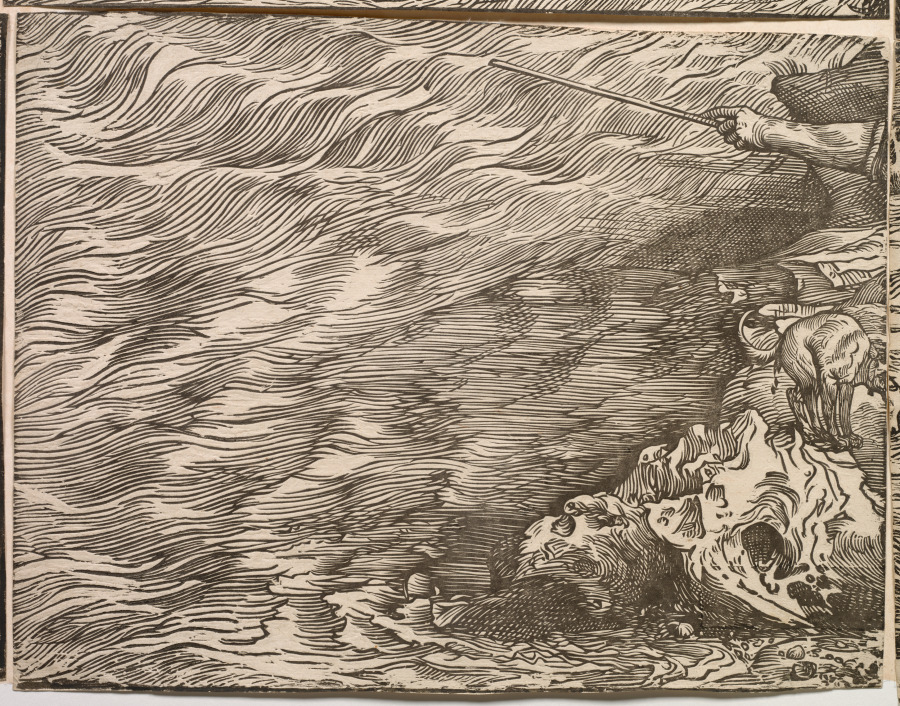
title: The Submersion of Pharaoh's Army in the Red Sea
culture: Italy, Venice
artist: Titian (Italian, c. 1488–1576)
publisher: Domenico dalle Greche (Italian, 1503–1603)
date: 1514–15, printed 1549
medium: woodcut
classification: Print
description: To make this monumental woodcut—considered one of the most ambitious prints of the Renaissance—Titian probably drew directly on the wooden blocks, after which a skilled cutter completed the blocks. The size rivals that of a painting, and the composition would have hung on a wall. Titian’s bold vision presents nature as a vehicle of God’s mercy and wrath. Moses, at right, having parted the seas for the Israelites to pass, commands them to close over the Egyptian forces (Exodus 14:21–31). Titian propelled the narrative with remarkable unity, dedicating entire blocks to the turbulent sea and rolling clouds that culminate in a magnificent cliff and Renaissance city. Some have interpreted the scene as an allegory of Venice’s troubles with the League of Cambrai, a military alliance that threatened the island city.